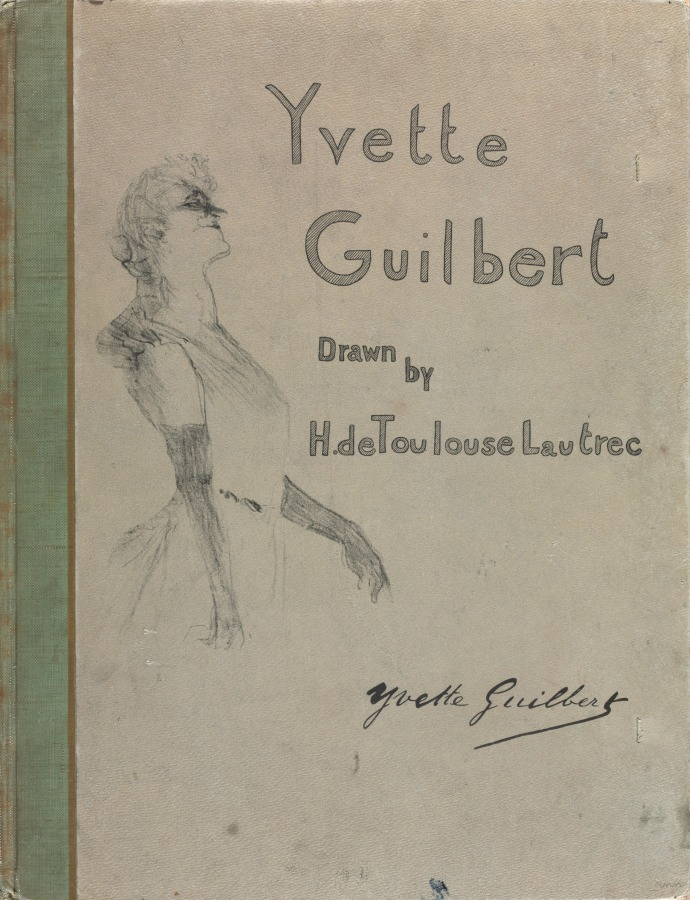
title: Yvette Guilbert-English Series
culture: France, 19th century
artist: Henri de Toulouse-Lautrec (French, 1864–1901)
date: 1898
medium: lithograph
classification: Bound Volume